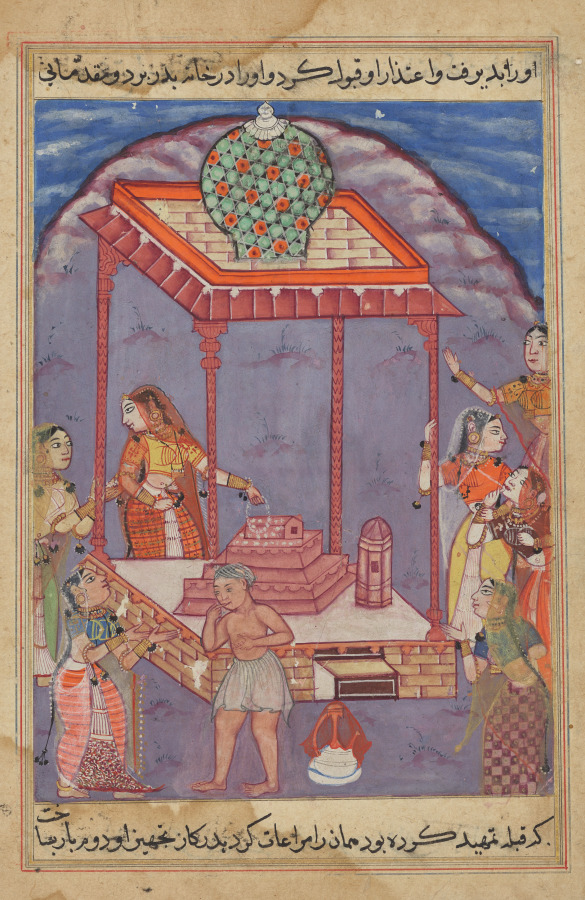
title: The destitute Mukhtar meets his wife Maimuna at a holy shrine, from a Tuti-nama (Tales of a Parrot): Twenty-fifth Night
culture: Mughal India, court of Akbar (reigned 1556–1605)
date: c. 1560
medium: gum tempera, ink, and gold on paper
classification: Painting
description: In the center of the image, a surprised Mukhtar, dressed in rags, confronts his wife. A few days prior, he had attempted to kill her in order to steal all of her possessions. Now destitute, Mukhtar begs for his wife’s forgiveness, which she grants.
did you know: A woman places a garland on a cenotaph, probably marking the grave of a Sufi holy man.